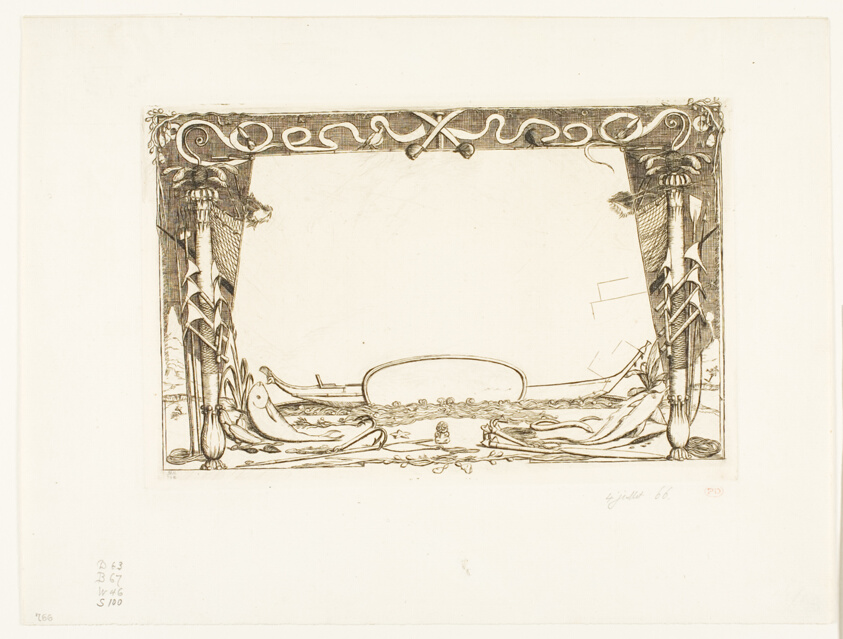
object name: Print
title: Cover for a Voyage to New Zealand (1842-46)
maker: Charles Meryon (French, 1821-1868)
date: 1866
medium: Etching on ivory laid paper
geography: France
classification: etching; print; prints and drawing